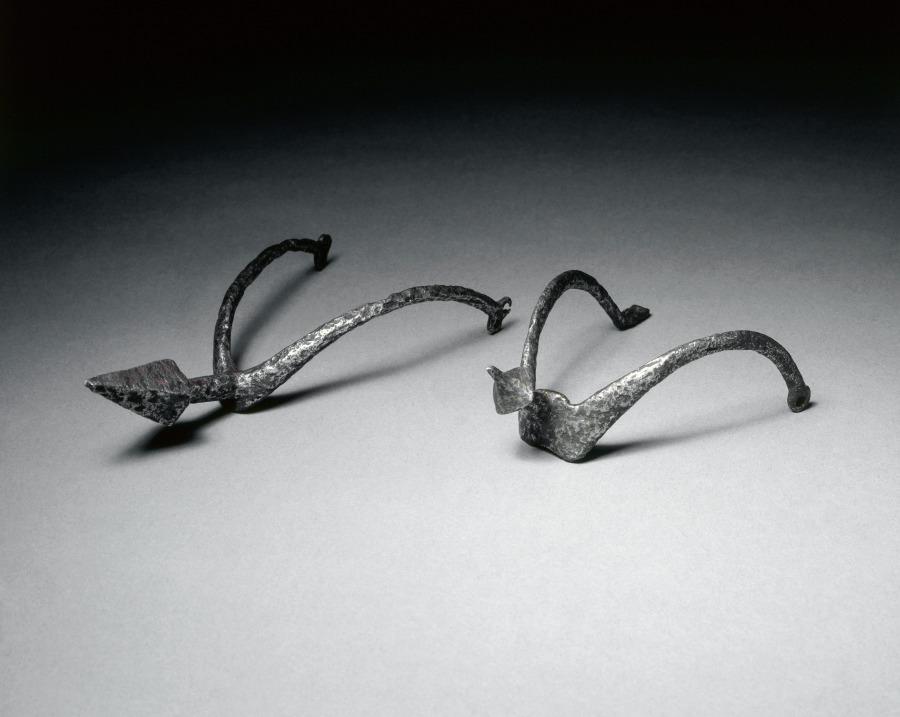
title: Pricked Spur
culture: Spain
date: 1200s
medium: steel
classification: Arms and Armor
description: The spur was an essential part of the knight's equipment. Fastened to his heels by means of straps and buckles, it was used to prod a horse into action. This example represents the oldest type recorded, the "pricked" spur, so-called because its neck terminated in a spike. The pricked spur was replaced during the Middle Ages by the "rowel" spur, with a rotating spiked wheel.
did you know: A knight’s status was closely related to his horse; as a result spurs became a symbol of chivalry and could be given as a token during a knighting.